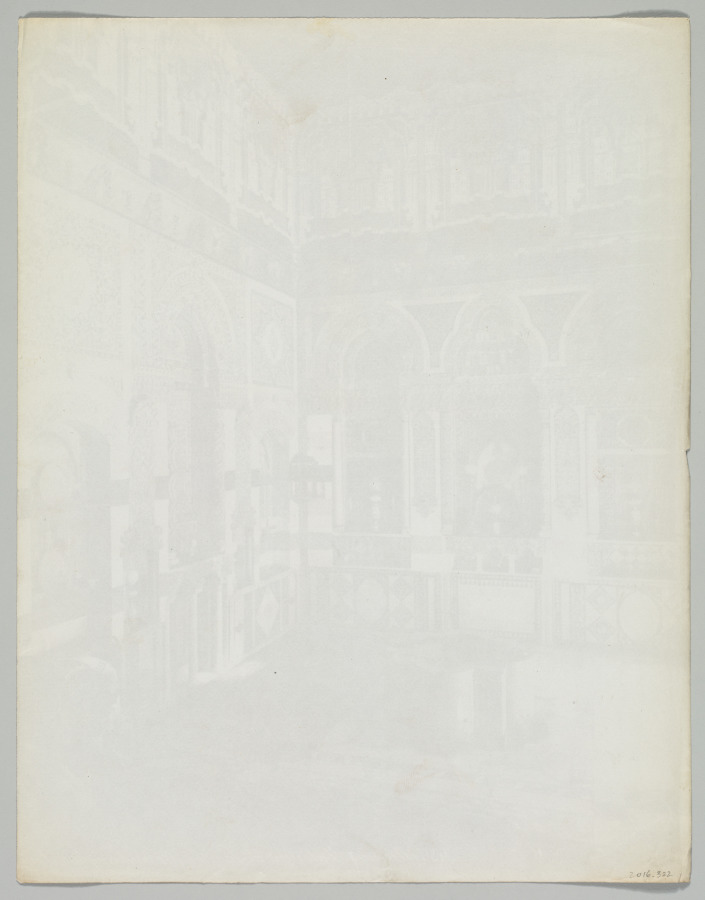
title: Damas. Intérieur de Maison. Consul Anglais (Syrie)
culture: France, 19th century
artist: Félix Bonfils (French, 1831–1885)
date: between 1867 and 1899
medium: albumen print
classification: Photograph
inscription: Imprinted in white on recto: “434. Damas Interieur de maison. Consul anglais/Syrie” Imprinted in white on recto: “Bonfils”